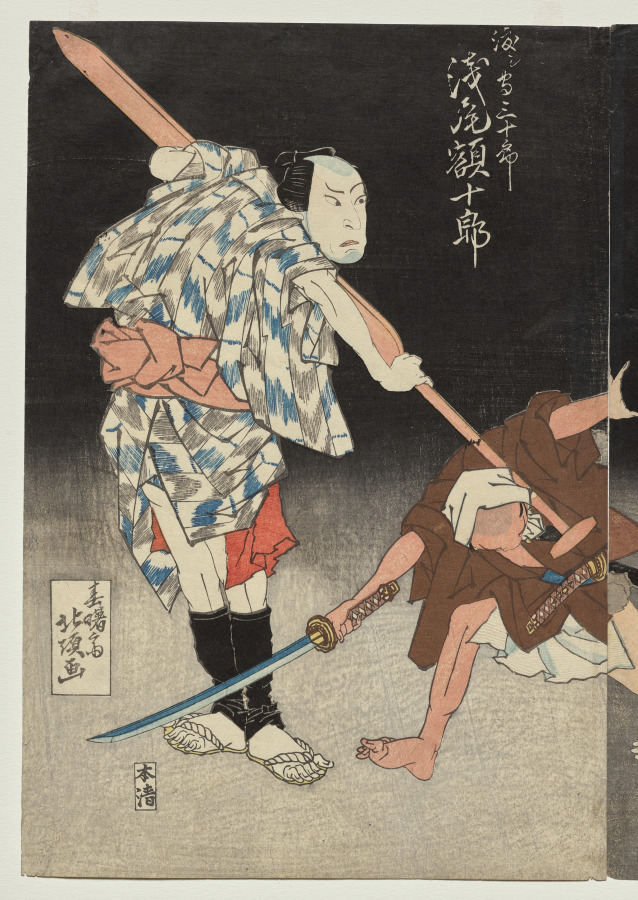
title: Asao Gakujurō as the Ferryman Sanjūrō from the Kabuki Play "Eight Views of the Kizu River by Boating Song"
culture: Japan, Edo period (1615–1868)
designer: Shunshosai Hokuchō (Japanese, active 1822–1830)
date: 1829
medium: Left print from a triptych of color woodblock prints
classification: Print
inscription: Signature: Shunshosai Hokucho ga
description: Three prints form a continuous scene from a Kabuki play written in 1778 by Namiki Gohei I (1747–1808) and produced at the Kado Theater in Osaka in the summer of 1829. It was the final performance for actor Ichikawa Ebijūrō II (1806–1829; right)—highly regarded for portraying villains—because he got sick and died several months later. This design belongs to a category of Japanese prints called “actor images” (yakusha-e or 役者絵). They were collected by fans of popular Kabuki actors. Kabuki is a kind of entertainment that got its start in the early Edo period, evolving from dance performances with simple storylines to long plays with complex plots, elaborate sets, and full musical accompaniments. Performers wear showy costumes and heavy makeup and strike poses called mie at critical moments in the narrative. Dialogue is spoken in a stylized way that resembles singing.